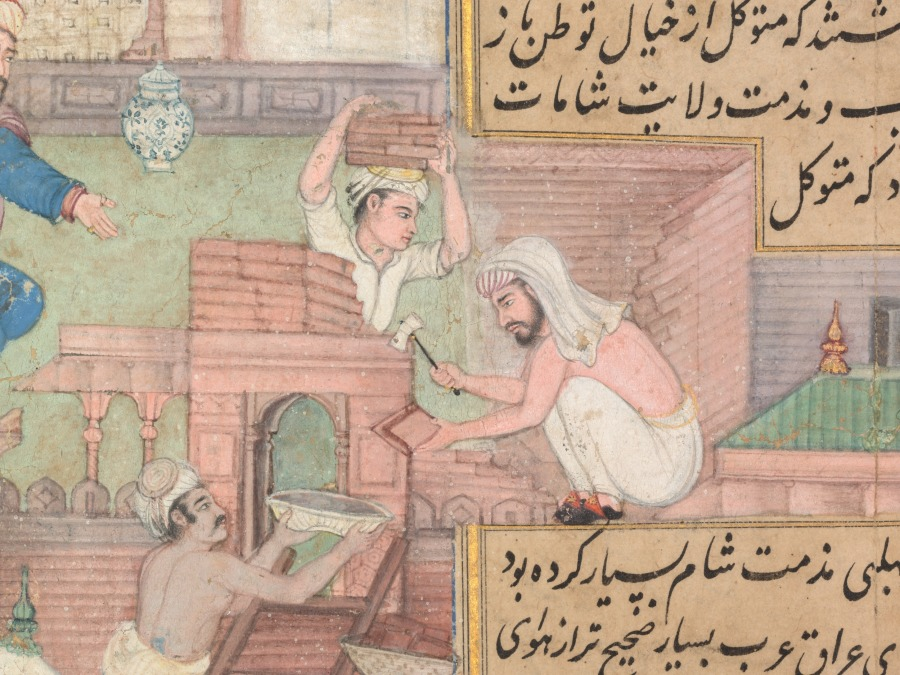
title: Page of disasters, from the Tarikh-i Alfi (History of the Thousand [Years])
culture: India, Mughal school, 16th century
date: c. 1595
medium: Gum tempera, ink, and gold on paper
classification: Painting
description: The 1,000th anniversary of Islam, according to the Hijri calendar followed by the Mughals and all Muslims, occurred during Akbar’s reign in 1592. He commemorated this milestone in many ways, including the commissioning of a new history of the Islamic world since the death of the Prophet Muhammad in 632. The episode discussed on this page took place during the 800s, when hailstorms beset Egypt and an earthquake hit Syria. The ruling caliph at the time was strongly prejudiced against Muslims who belonged to the Shi‘ite branch of Islam. Akbar seemed to be asking his artists to emphasize the natural disasters that took place, suggesting that they occurred as a result of the ruler’s intolerance.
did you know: Devastation after an earthquake includes a horse trapped under a fallen pavilion.